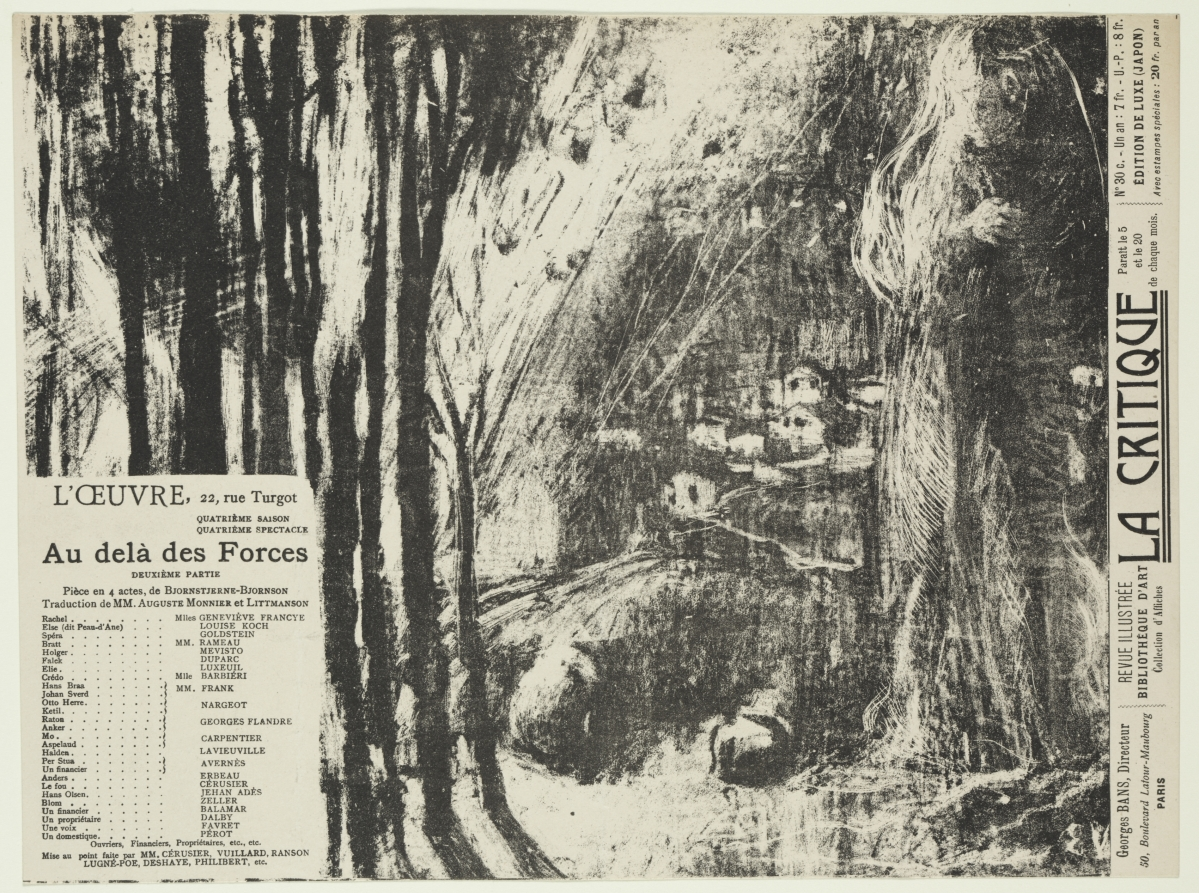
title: Beyond Human Forces (Part 2)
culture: France, 19th century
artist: Édouard Vuillard (French, 1868–1940)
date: 1897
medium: lithograph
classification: Print